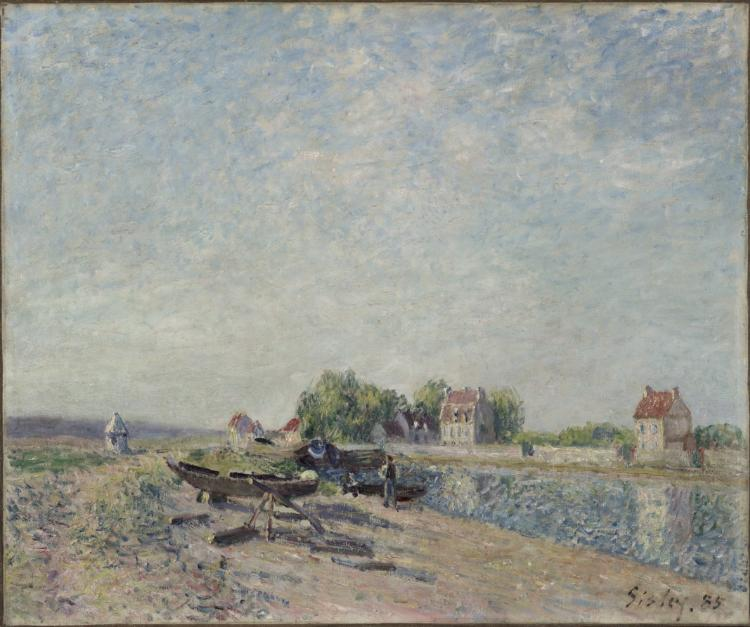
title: Saint-Mammès, Loing Canal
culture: France, 19th century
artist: Alfred Sisley (French, 1840–1899)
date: 1885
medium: oil on fabric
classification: Painting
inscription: Signed lower right: Sisley. 85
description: The small town of Saint-Mammès is located about forty miles south of Paris, where the Seine and Loing rivers are joined by a canal. Alfred Sisley was fond of the area and often painted there in the 1880s, undoubtedly attracted by the low rents, since his poverty had become chronic in the wake of the bankruptcy and death of his father. Sisley rendered this view of the Saint-Mammès-Loring canal with a classic Impressionist technique, using pure color and soft, flickering brushwork that dissolves forms into a haze of optical sensations approximating the effect of brilliant, outdoor light.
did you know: The son of an affluent British businessman, Alfred Sisley was born in Paris and became friendly with fellow students Claude Monet, Auguste Renoir, and Frédéric Bazille while studying in the studio of Charles Gleyre during the early 1860s.